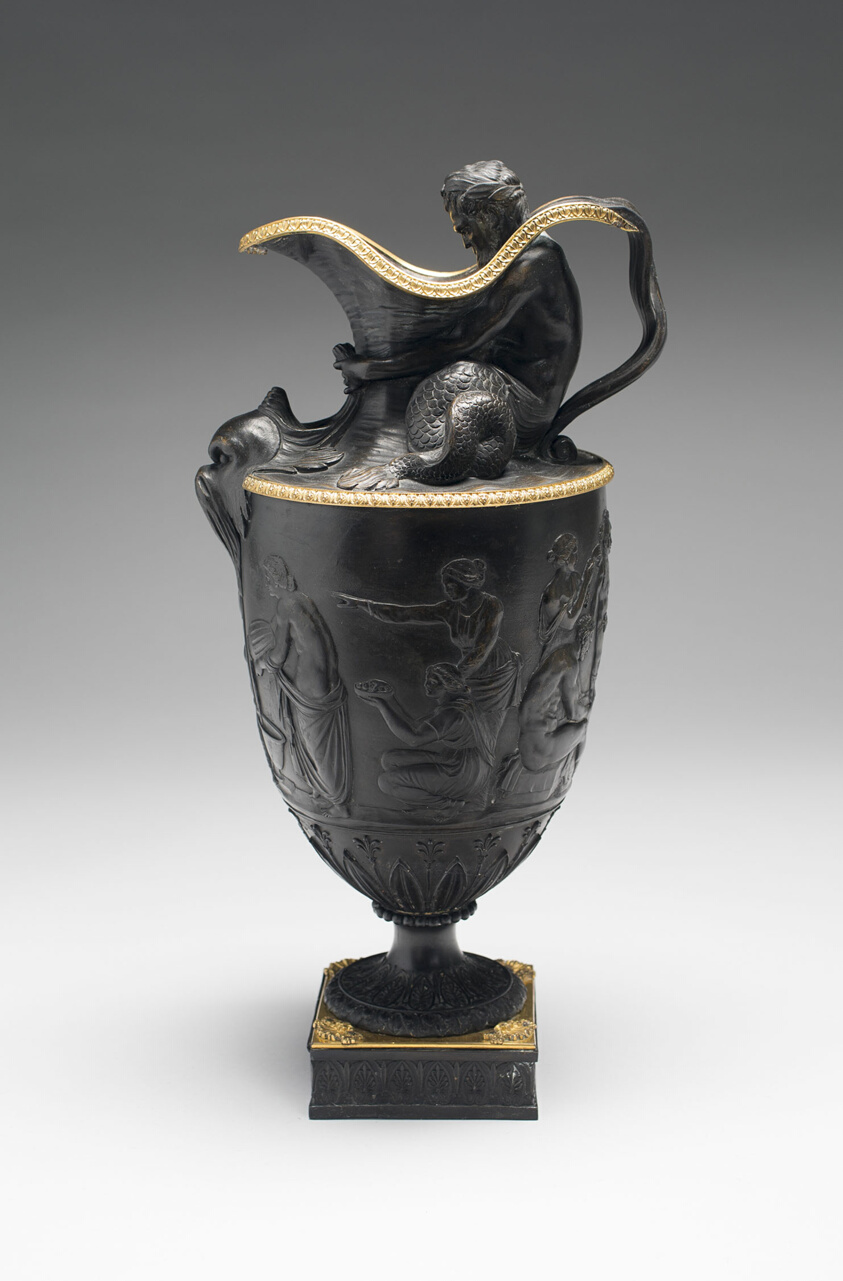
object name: Ceramics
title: Water Ewer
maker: Wedgwood Manufactory; England, founded 1759; Etruria, Staffordshire, England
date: 1780–85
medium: Stoneware (basaltware)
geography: Burslem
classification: ewer (vessel); vessel; tableware; stoneware; european decorative arts; ceramics